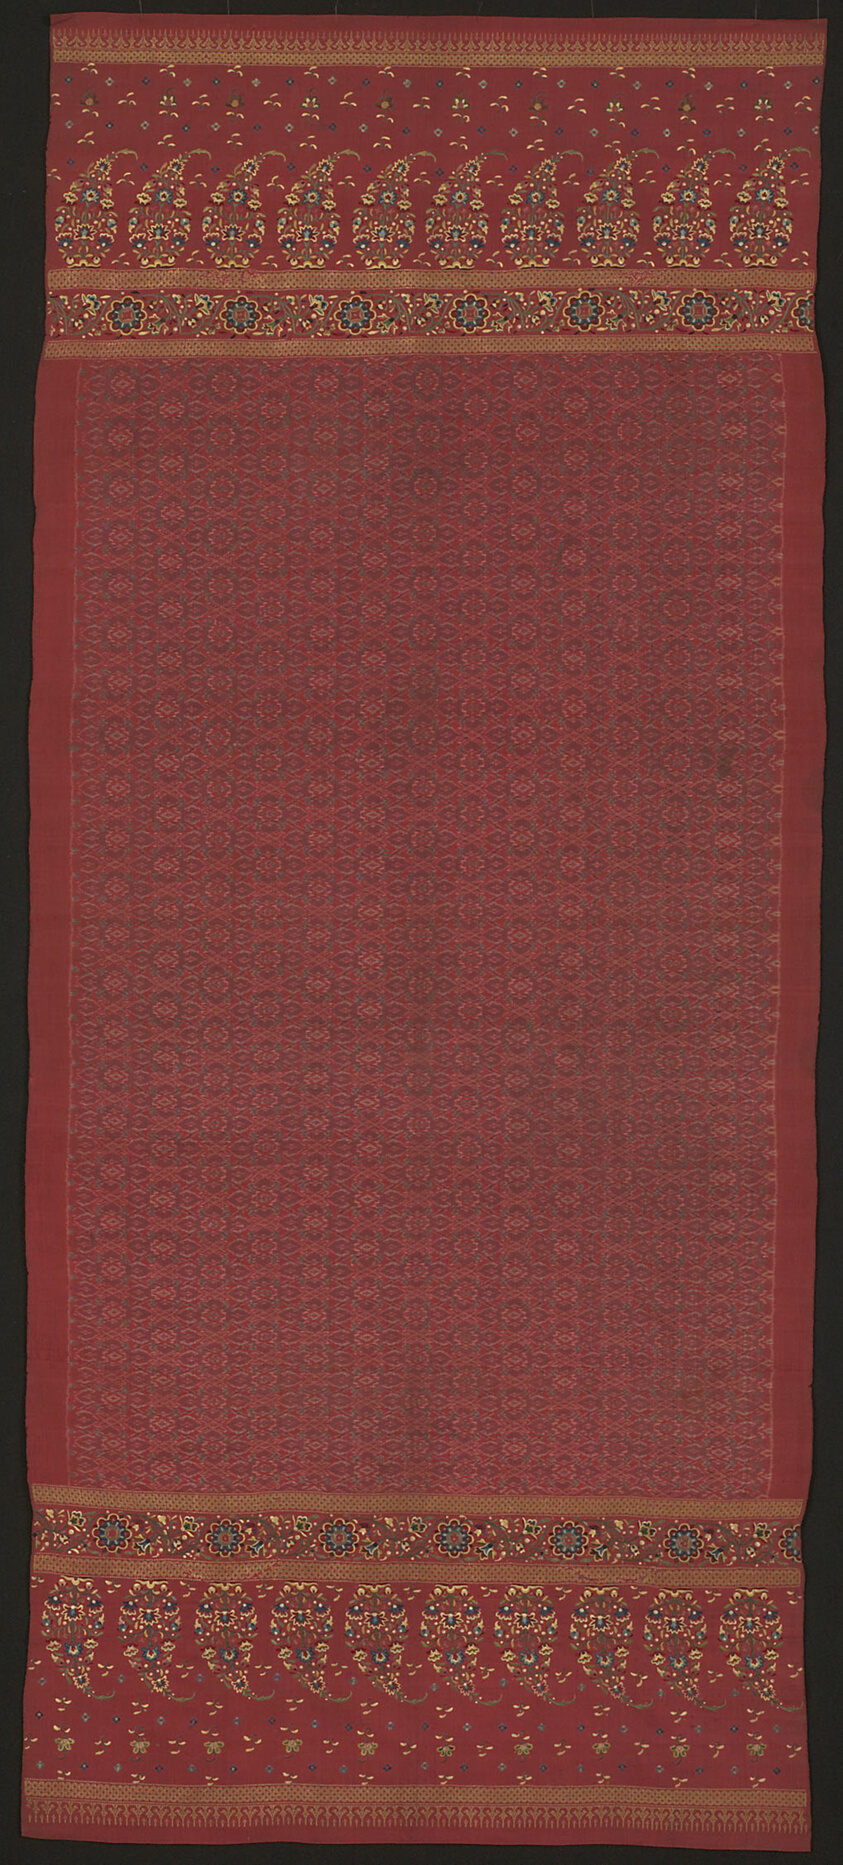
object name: Textile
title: Woman's Selendang Limar (Shoulder Cloth)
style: 19th century, indonesian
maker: Palembang area, south Sumatra, Indonesia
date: Late 19th century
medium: Silk and gold-leaf-over-lacquered-paper-strip-wrapped silk, weft resist dyed (weft ikat), plain weave with supplementary patterning wefts; embroidered with silk in satin, single satin, and stem stitches; embellished with gold spangles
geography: Indonesia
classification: textile; needlework (visual works); costume accessory; garment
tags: paisley, floral